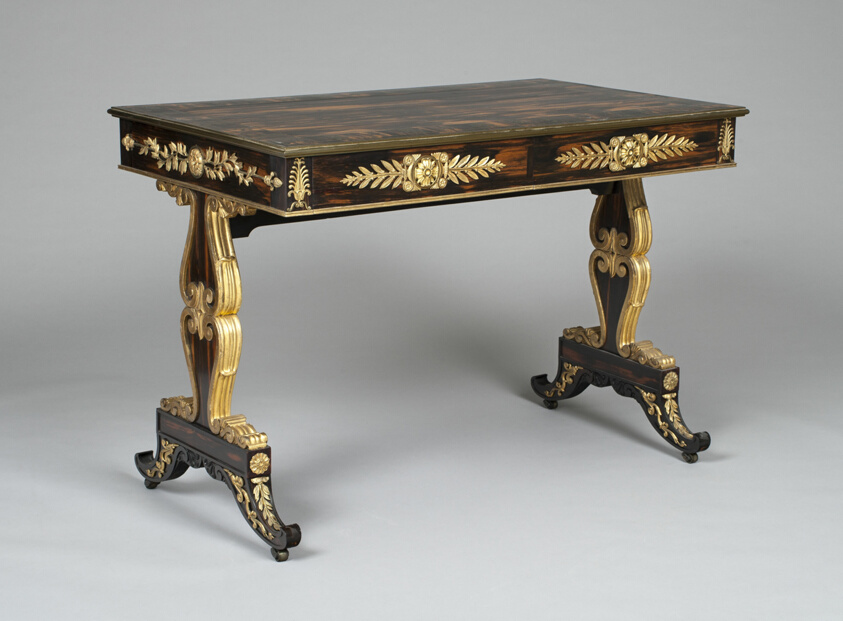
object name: Furniture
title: Sofa Table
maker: England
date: c. 1805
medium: Oak, calamander, and gilt brass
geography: England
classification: table; furniture; european decorative arts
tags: furniture